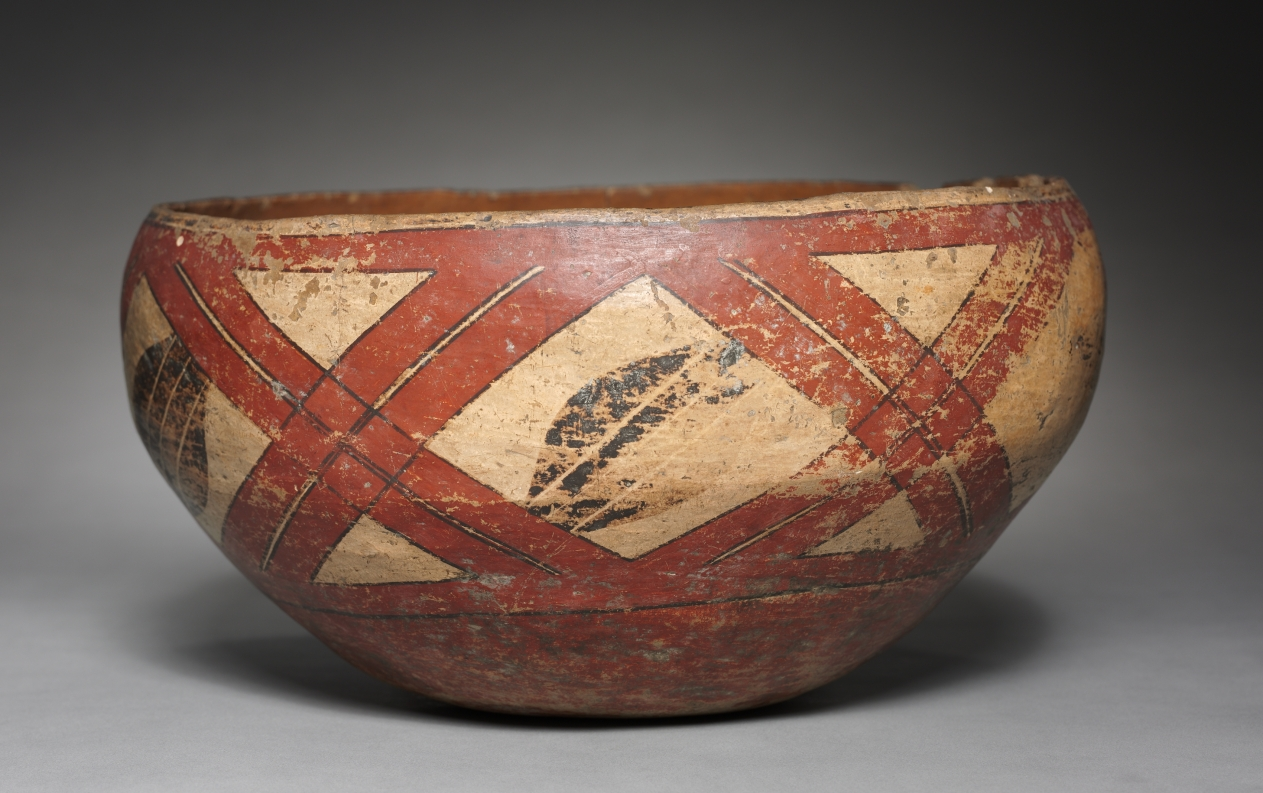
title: Stew Bowl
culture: Southwest,Pueblo, Acoma, Post-Contact Period, 20th century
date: 1860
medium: ceramic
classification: Ceramic